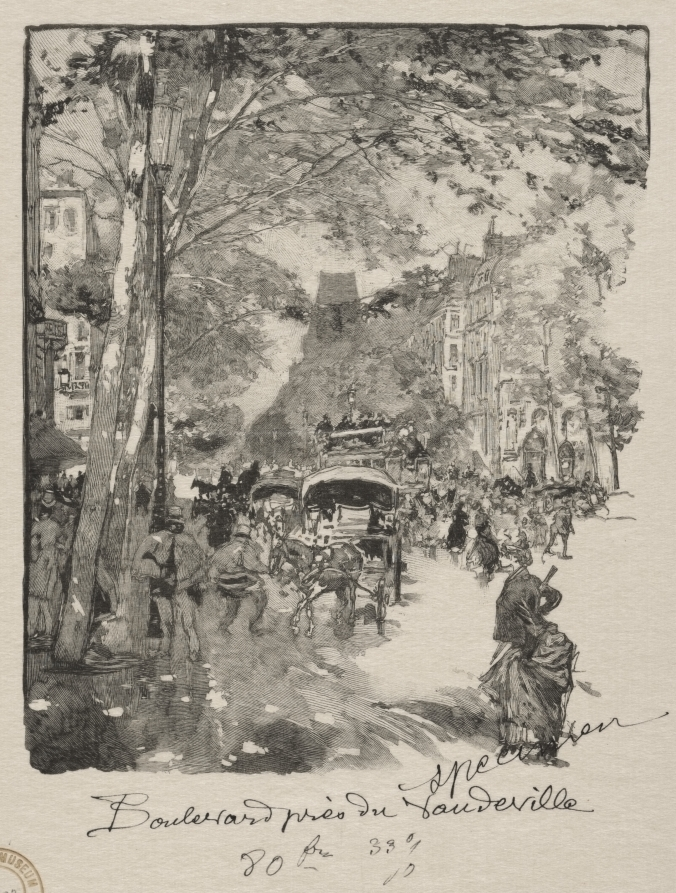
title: Le Boulevard près du Vaudeville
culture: France, 19th-20th century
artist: Auguste Louis Lepère (French, 1849–1918)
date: 1889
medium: wood engraving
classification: Print